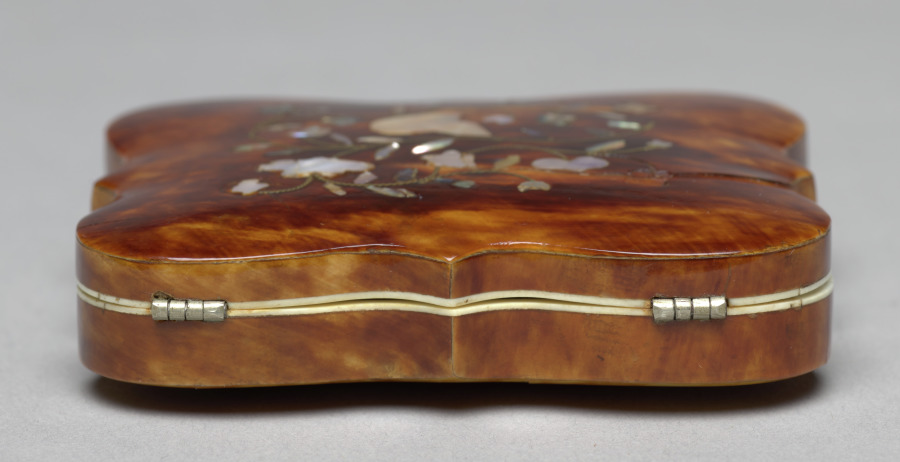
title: Woman with elaborate nautical backdrop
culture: America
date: c. 1860–65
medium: ambrotype, tinted, ninth plate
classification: Photograph